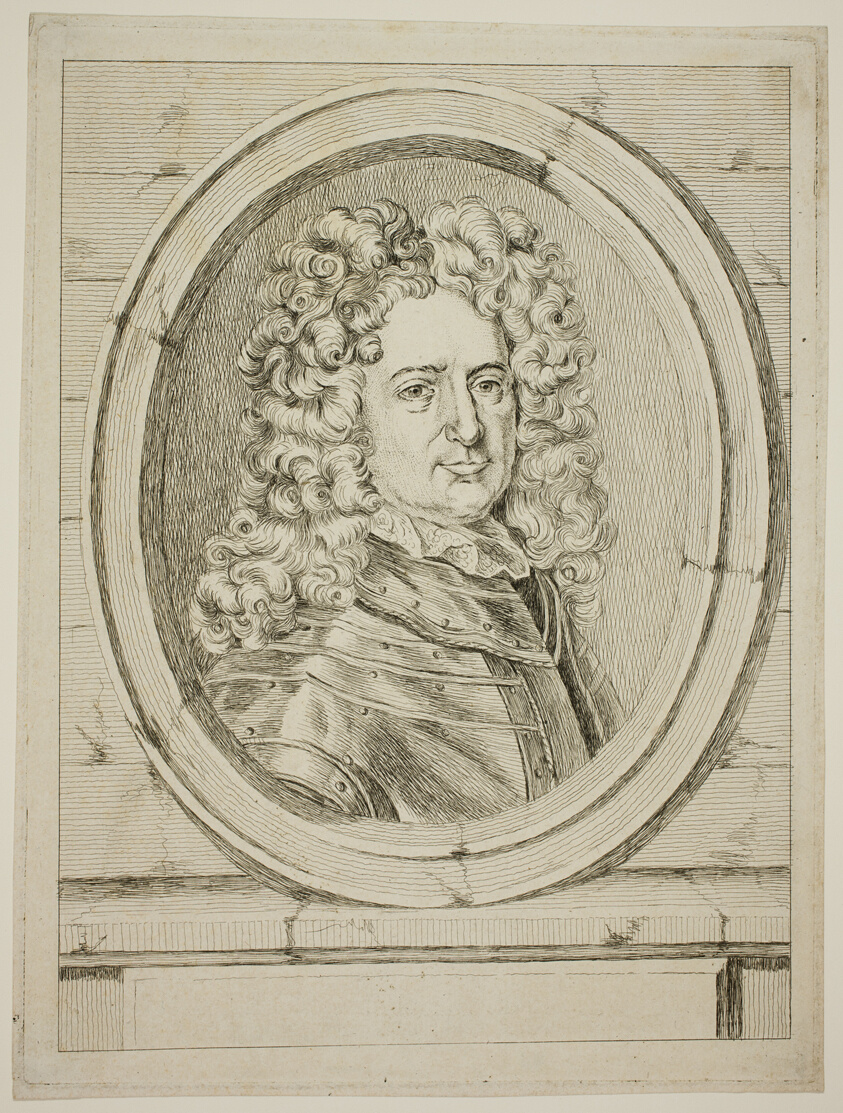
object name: Print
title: Roger de Rabutin, Comte de Bussy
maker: Ange-Laurent de La Live de Jully; French, 1725-1770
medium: Etching on paper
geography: France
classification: etching; paper; print; prints and drawing